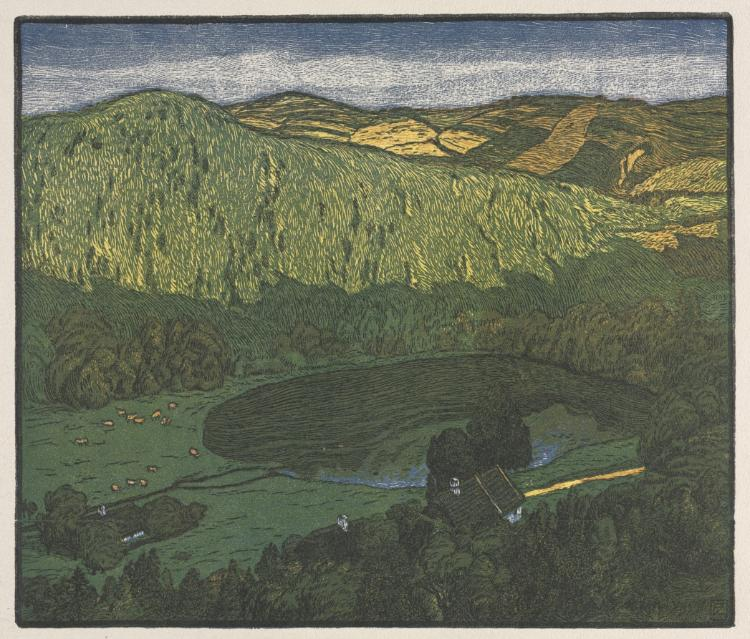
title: Lillte Sea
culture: Czechoslovakia, early 20th Century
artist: Adolf Zdrazila (Czech, 1868–1942)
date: 1903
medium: color woodcut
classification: Print